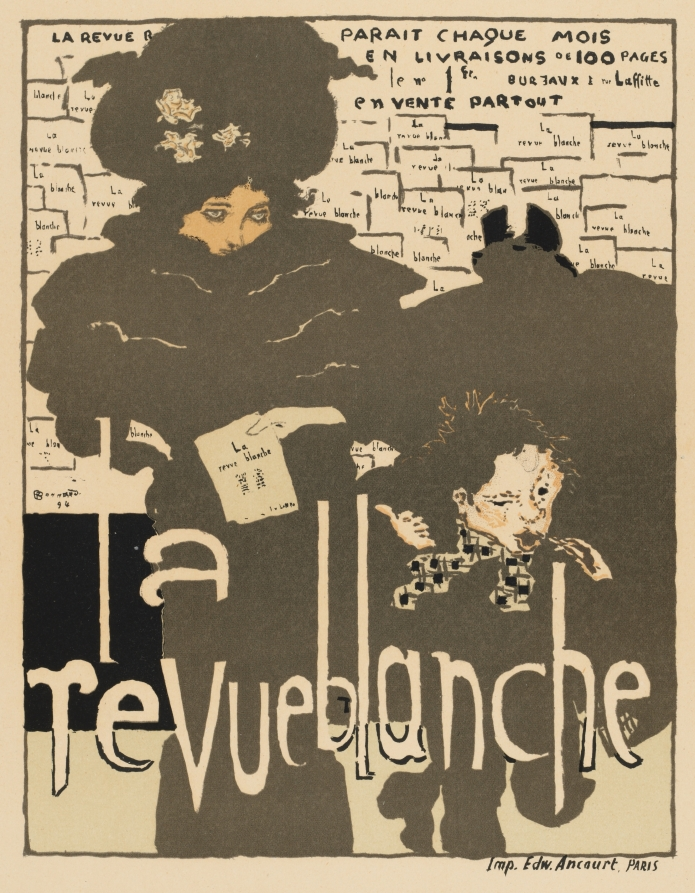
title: La Revue Blanche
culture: France, 19th century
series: Masters of the Poster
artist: Pierre Bonnard (French, 1867–1947)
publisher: Edward Ancourt (French, 1841–1898?)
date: 1894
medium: color lithograph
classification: Print